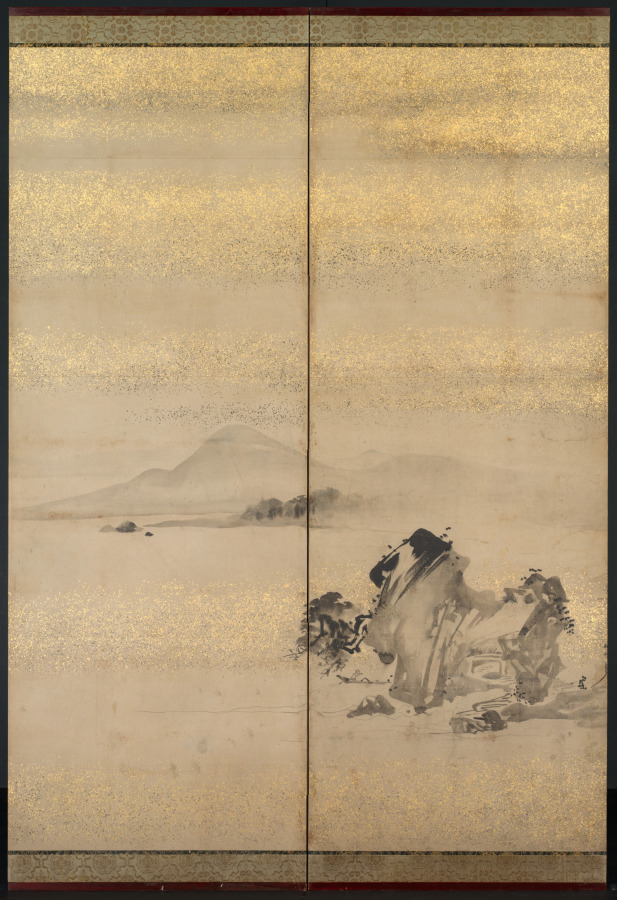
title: Summer and Winter Landscapes (one of a pair)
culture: Japan, Edo period (1615–1868)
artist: Kano Naonobu (Japanese, 1607–1650)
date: 1600s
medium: six-panel folding screen; ink on gold- and silver-decorated paper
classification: Painting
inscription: signed: "Jitekisai Naonobu"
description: This sparse composition depicts a summer scene on the right and a winter scene on the left. Careful observation reveals that the pair of screens was once damaged, and a later conservation including new sections of paper and inpainting sought to preserve the original flavor of the paintings so they could continue to be appreciated. Kano Naonobu was born in Kyoto, the younger brother of major painter and authenticator Kano Tan’yū (1602–1674). He relocated to Edo (present-day Tokyo) at the behest of the Tokugawa government in 1630 where he worked with his brother and teacher. In Kyoto, he helped his brother with paintings for Nijō Castle and the major Pure Land Buddhist temple Chion’in.